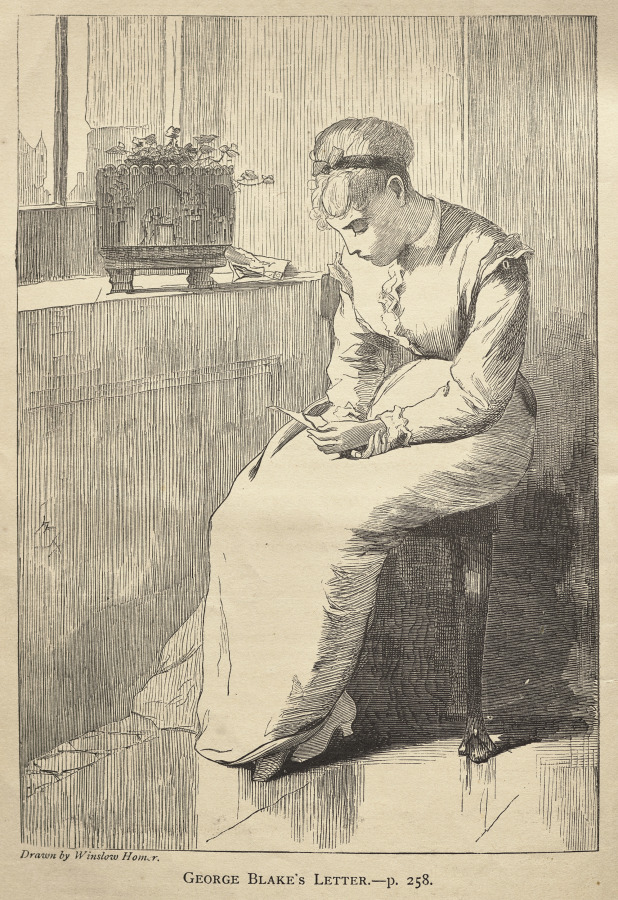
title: George Blake's Letter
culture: America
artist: Winslow Homer (American, 1836–1910)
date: 1870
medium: wood engraving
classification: Print